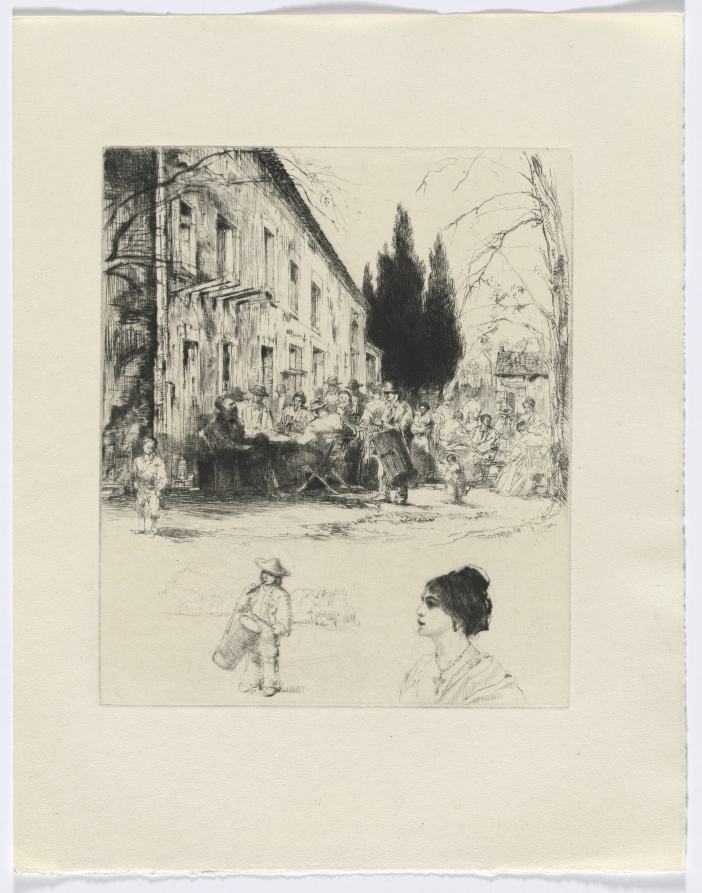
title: Frédéric Mistral: Mémoires et Recits by Frédéric Mistral: figures at outdoor table/ man playing drum and bust of a woman (insert after p. 136)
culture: France, 20th century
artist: Auguste Brouet (French, 1872–1941)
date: 1937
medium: etchings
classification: Portfolio